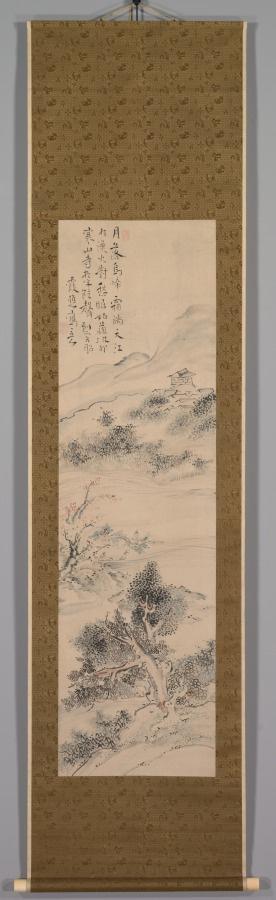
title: Illustration of Zhang Qi's Poem on the Cold Mountain Temple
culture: Japan, Edo period (1615–1868)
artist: Ike Taiga (Japanese, 1723–1776)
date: mid- to late 1700s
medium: hanging scroll; ink and color on paper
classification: Painting